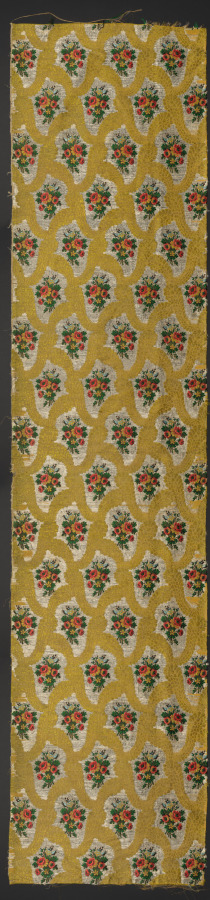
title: Coverlet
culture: Italy, 18th century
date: 1700s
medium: silk, metallic thread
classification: Textile